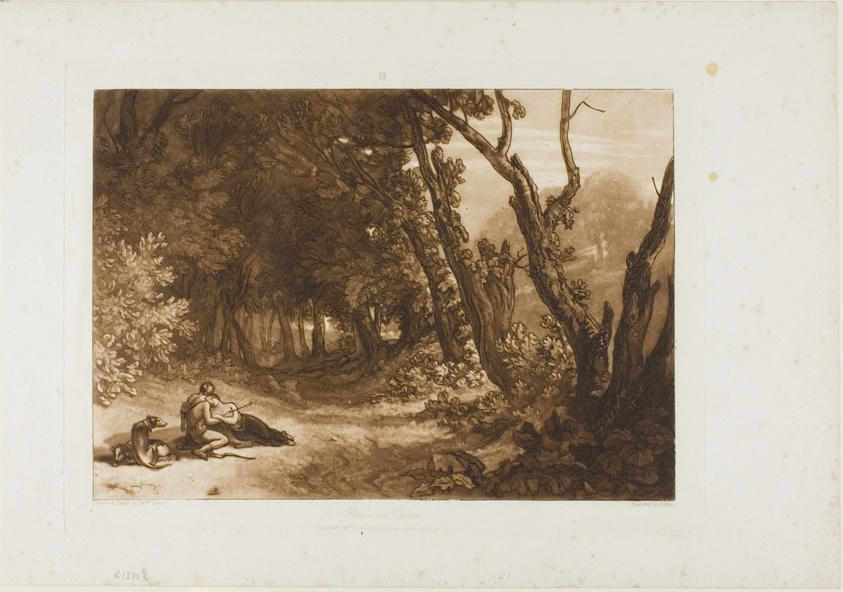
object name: Print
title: Procris and Cephalus, plate 41 from Liber Studiorum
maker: Joseph Mallord William Turner (English, 1775-1851); Engraved by G. Clint (1770-1854)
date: published February 14, 1812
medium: Etching and engraving in brown on off-white wove paper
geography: England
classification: mezzotint; print; prints and drawing